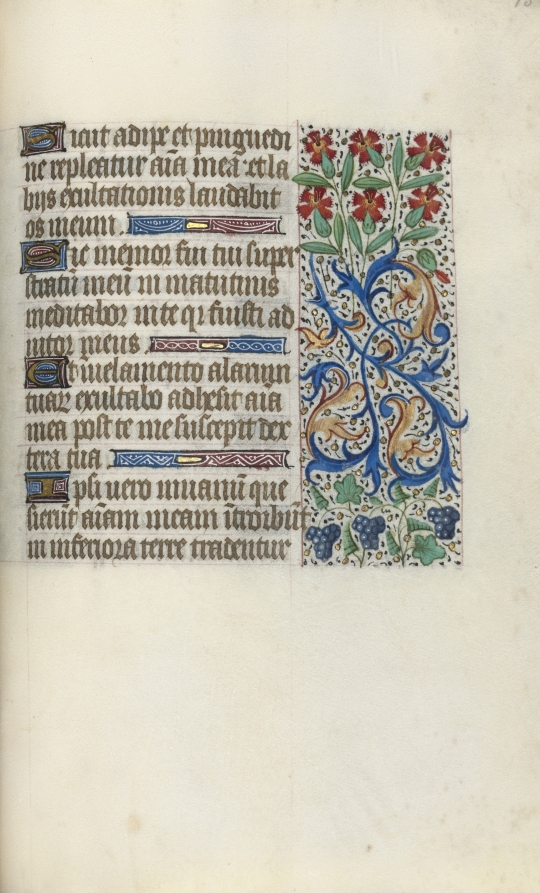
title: Book of Hours (Use of Rouen): fol. 138r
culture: France, Rouen, 15th century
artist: Master of the Geneva Latini (French, active Rouen, 1460–80)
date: c. 1470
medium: ink, tempera, and gold on vellum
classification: Bound Volume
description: In the late 1400s and early 1500s Rouen was an established and important center of book production. The city’s cathedral had a wealthy chapter that spent large sums of money to commission books and to maintain its extensive library. The stationers and booksellers would have likely been concentrated in or near the cathedral precinct. This artist, named after a manuscript now in Geneva, was Rouen’s principal illuminator during the second half of the 1400s.